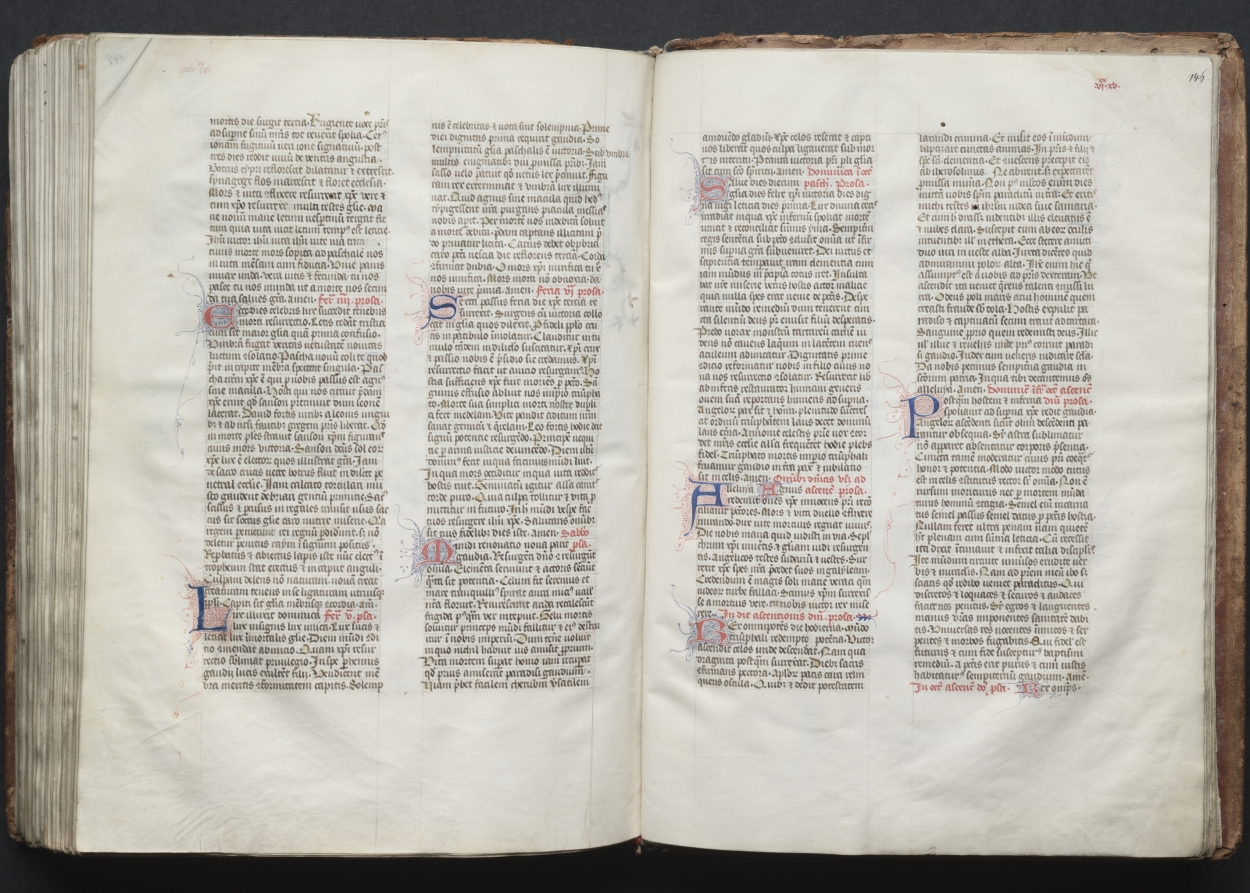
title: The Gotha Missal: Fol. 146r, Text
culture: France, Paris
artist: Master of the Boqueteaux (French)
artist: and Workshop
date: c. 1375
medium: ink, tempera, and gold on vellum; blind-tooled leather binding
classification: Bound Volume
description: The style and quality of this manuscript's decoration is typical of deluxe Parisian books made for aristocratic or royal patrons. Most of the book's decoration appears to be the work of the Master of the Boqueteaux, an artist active at the court of King Charles V (died 1380). His style was apparently shared by a number of book illuminators working in and around Paris. It is very possible that the Gotha Missal belonged to Charles V, but is not provable because the manuscript has no royal portraits and lacks a colophon. Given the book's magnificent decoration, however, it would seem that it was produced for a Valois prince, if not for the king himself. The manuscript receives its name from the German dukes of Gotha, its later owners.